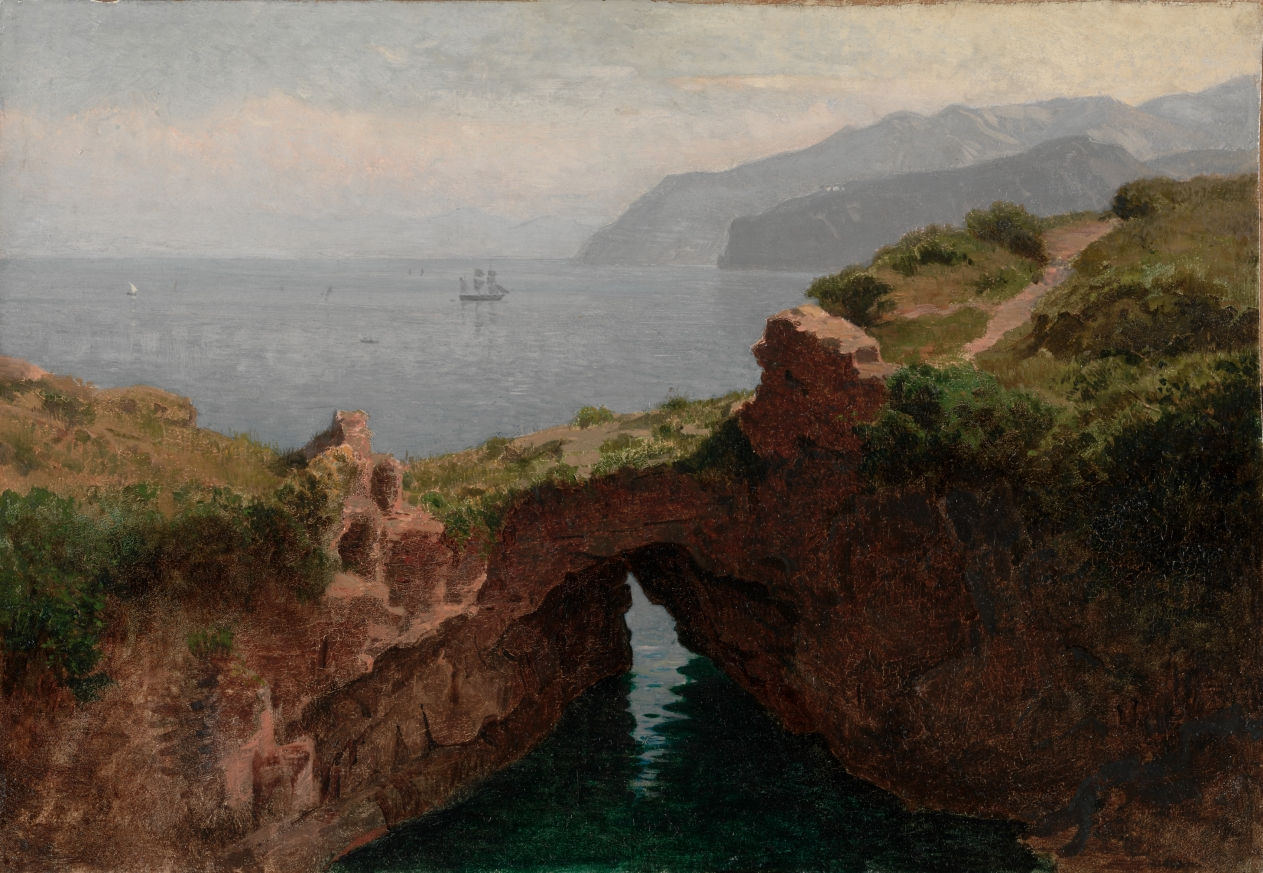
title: Natural Bridge, Sorrento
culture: America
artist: William Stanley Haseltine (American, 1835–1900)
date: 1856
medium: oil on paper mounted on canvas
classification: Painting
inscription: Written on stretchers: Capri by Wm. S. Haseltine